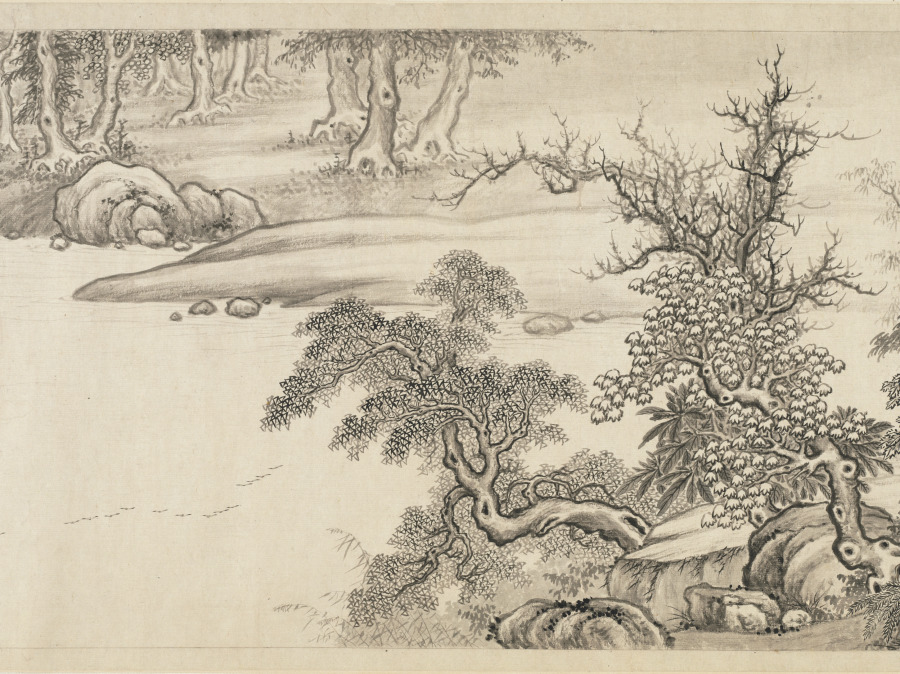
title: Meditative Visit to a Mountain Retreat: In Picture and in Words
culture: China, Ming dynasty (1368–1644)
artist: Xiang Shengmo (Chinese, 1597–1658)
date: 1648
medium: handscroll; ink on paper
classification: Painting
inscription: Artist's title and 3 seals (in front of painting): [title] Meditative Visit to a Mountain Retreat: In Picture and in Words 巖栖思訪圖詠 [3 seals] Tian lai ge zhong wen sun 天籟閣中文孫; Xiang shi kong zhang zui xin han mo 項氏孔彰醉心翰墨; Qing fu yuan zhong di yi miao ye 清福緣中第一妙業.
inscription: [印] 兔烏叟; 考古正今. 觀斯人兮何逍遙，非逍遙兮思其友。 思其友兮天一方，欲一訪之難回首。 松耶柏耶稱後凋，巖穴霏微何二酉。 山兮水兮人悠悠，遠莫致之神交否？ 河關一向望不及，言笑于今更非偶。 問游魚兮樂何深？問飛鳥兮歸何藪？ 問猿鶴兮何親疎？問鹿豕兮何夭壽？ 問白雲兮從何來？問流泉兮向何走？ 問漁樵兮何江山？問草木兮何畝畎？ 問春秋兮何炎涼？問世人兮何長久？ 問日月兮何晦明？曾見當時烏兔叟？ 戊子嘉平之初偶作此圖并題。 胥樵項聖謩識。 [印] 兔烏叟; 項氏孔彰; 未喪斯文.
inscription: 13 additional seals: 4 of Tang Zuomei 唐作梅 (late 18th–19th century); 3 of Zhang Baixi 張百熙 (1847–1907); 4 of Zhang Heng 張珩 (1915–1963); 2 unidentified.